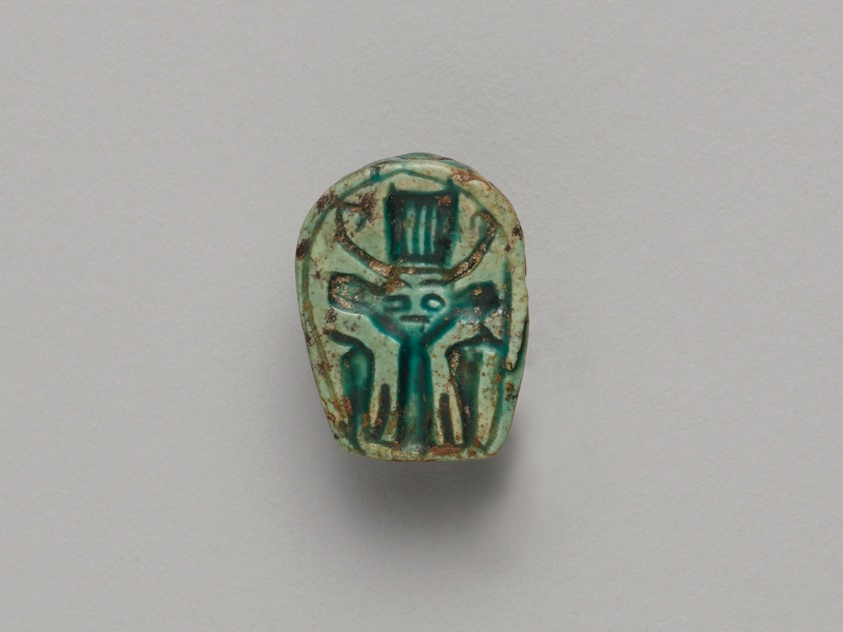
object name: Costume and Accessories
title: Scaraboid in the Form of a Duck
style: new kingdom, egyptian, ancient, eighteenth dynasty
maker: Egyptian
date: New Kingdom, Dynasty 18 (about 1550–1295 BCE)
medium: Glazed steatite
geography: Egypt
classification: scaraboids; seal; amulet; ancient art; costume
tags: ducks, cobras, musical instruments